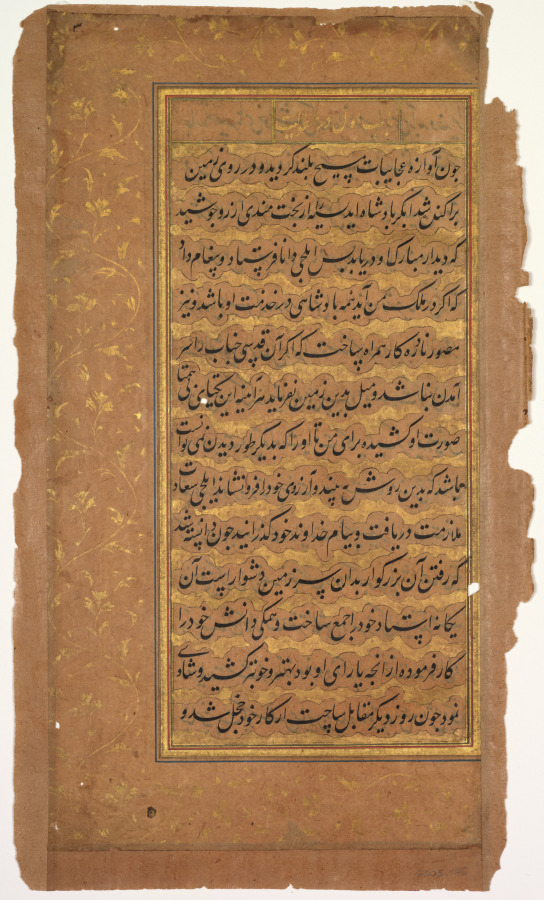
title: Text, Folio 2 (recto) from a Mirror of Holiness (Mir’at al-quds) of Father Jerome Xavier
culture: Mughal India, Allahabad, made for Prince Salim (1569–1627)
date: 1602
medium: Ink and gold on paper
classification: Manuscript